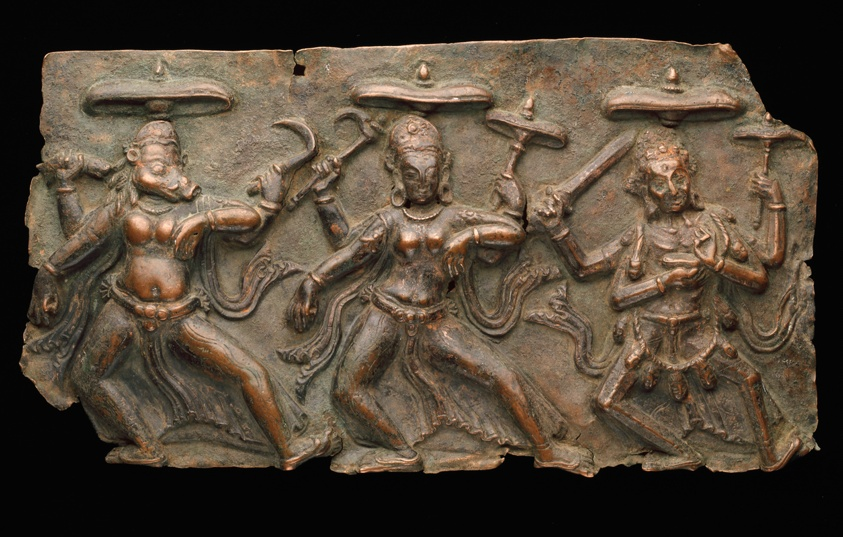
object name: Sculpture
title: Fragment of a Plaque with Dancing Ganesha and the Mother Goddesses Brahmani and Maheshvari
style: Himalayan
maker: Nepal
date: c. 10th/11th century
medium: Copper repoussé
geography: Nepal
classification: copper; metal; sculpture; asian art